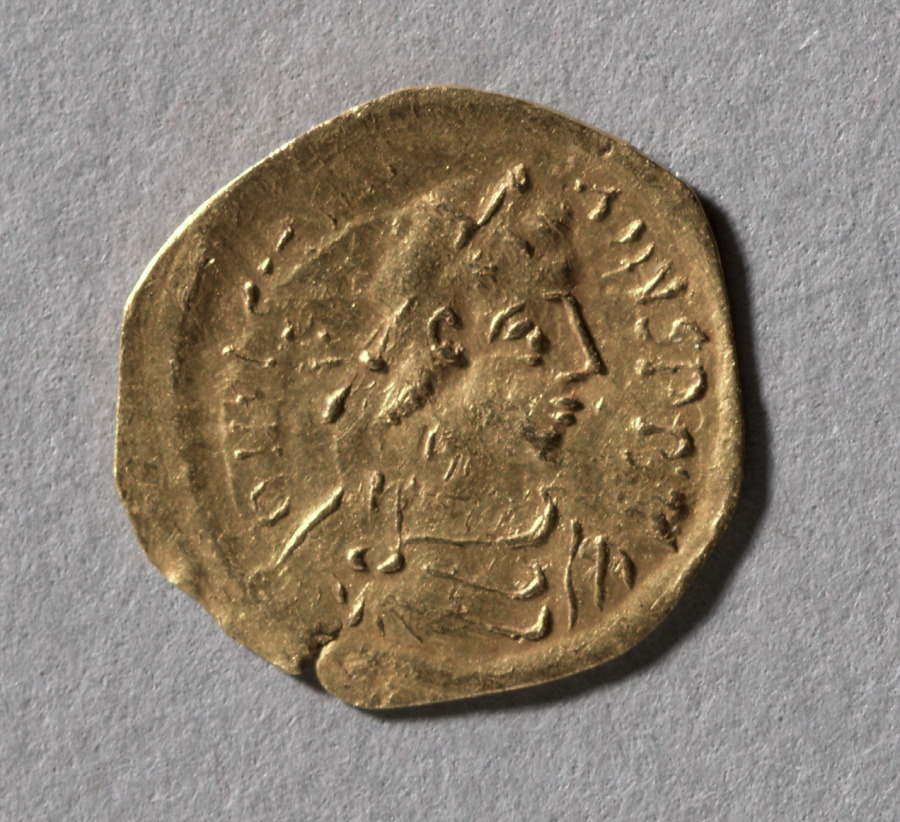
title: Half Tremissis of Justinian I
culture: Byzantinium, Constantinople, Byzantine period, 6th century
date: 527–565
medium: gold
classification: Coins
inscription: (Avers): DNIVSTINI ANVSPPA[VC] (Revers): VICTORIAAVC[VS]TORVM and CONO[B]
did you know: Tremissis means "a third of a unit," referring to this coin's value in ancient Greece.